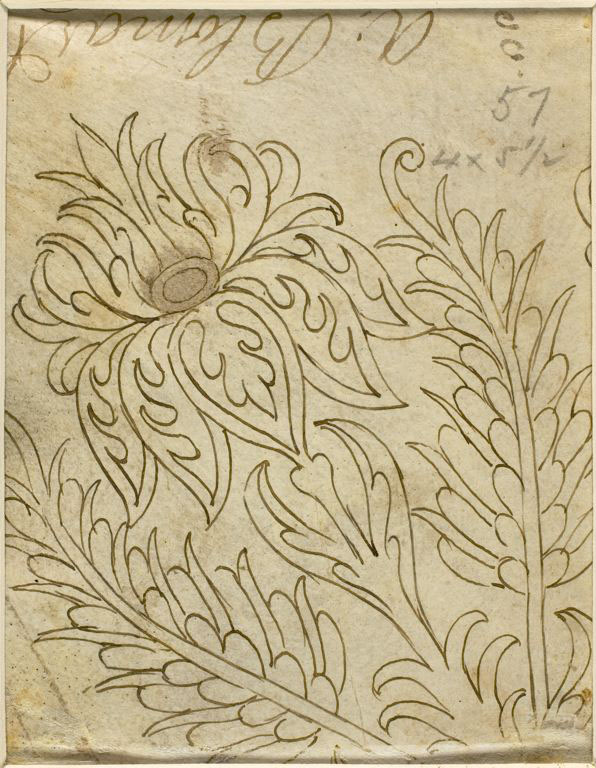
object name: Drawing and Watercolor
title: Head of Bearded Old Man (recto); Decorative Sketch of Flower and Leaves (verso)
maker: After Jacopo Negretti, called Palma il Giovane; Italian, c. 1548-1628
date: 17th/18th century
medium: Pen and brown ink (recto and verso) on vellum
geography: Italy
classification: ink with wash; drawings (visual works); prints and drawing